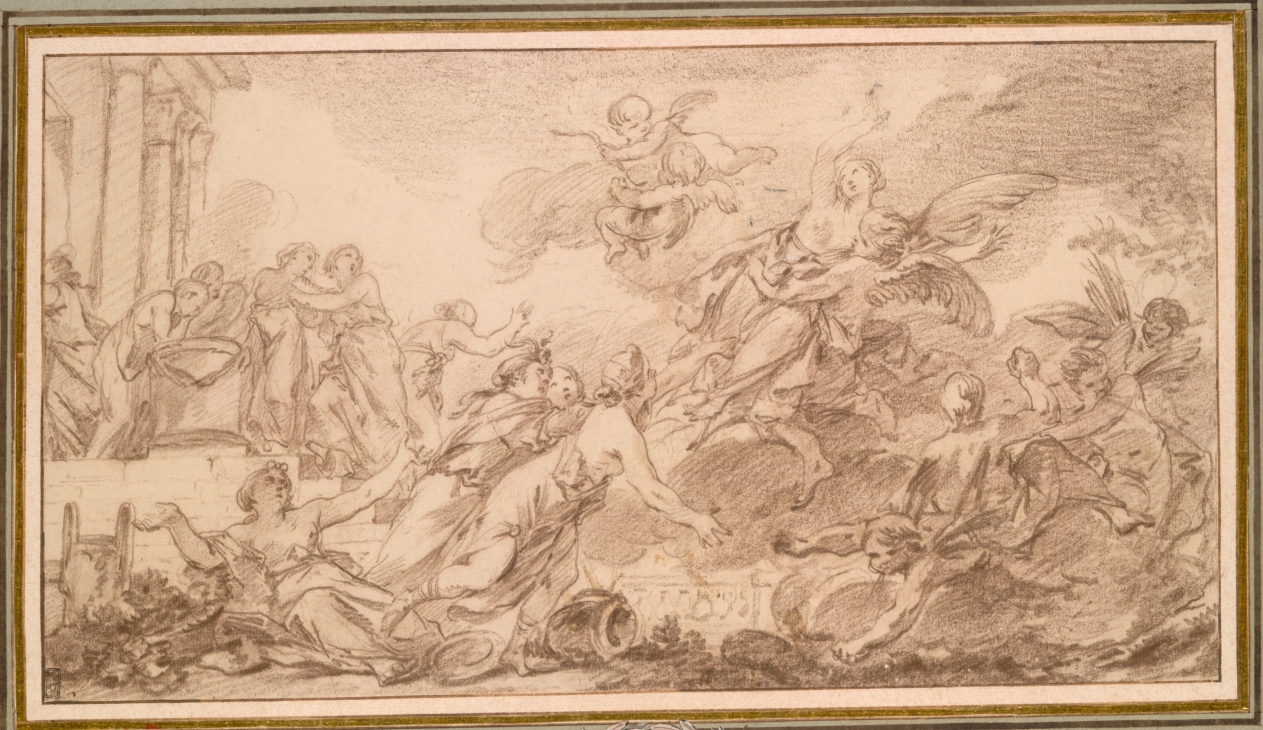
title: Boreas Abducting Oreithyia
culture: France, 18th century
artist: Jean-Baptiste-Marie Pierre (French, 1713–1789)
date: c. 1755–1760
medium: red chalk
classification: Drawing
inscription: Signed in brown ink with the initial 'P' lower left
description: Pierre took the subject of this drawing from the celebrated work the Metamorphoses by the Roman poet Ovid (43 bc-ad 17), which recounts the loves of the gods and goddesses of antiquity. Oreithyia, daughter of Erectheus, king of Athens, so inspired the passion of the god of the north wind, Boreas, that he descended to the earth to kidnap her. Although this subject was not especially common, Ovid was a favorite source for painters during the 1700s. Pierre was influenced here by a tapestry designed by François Boucher showing the same scene.